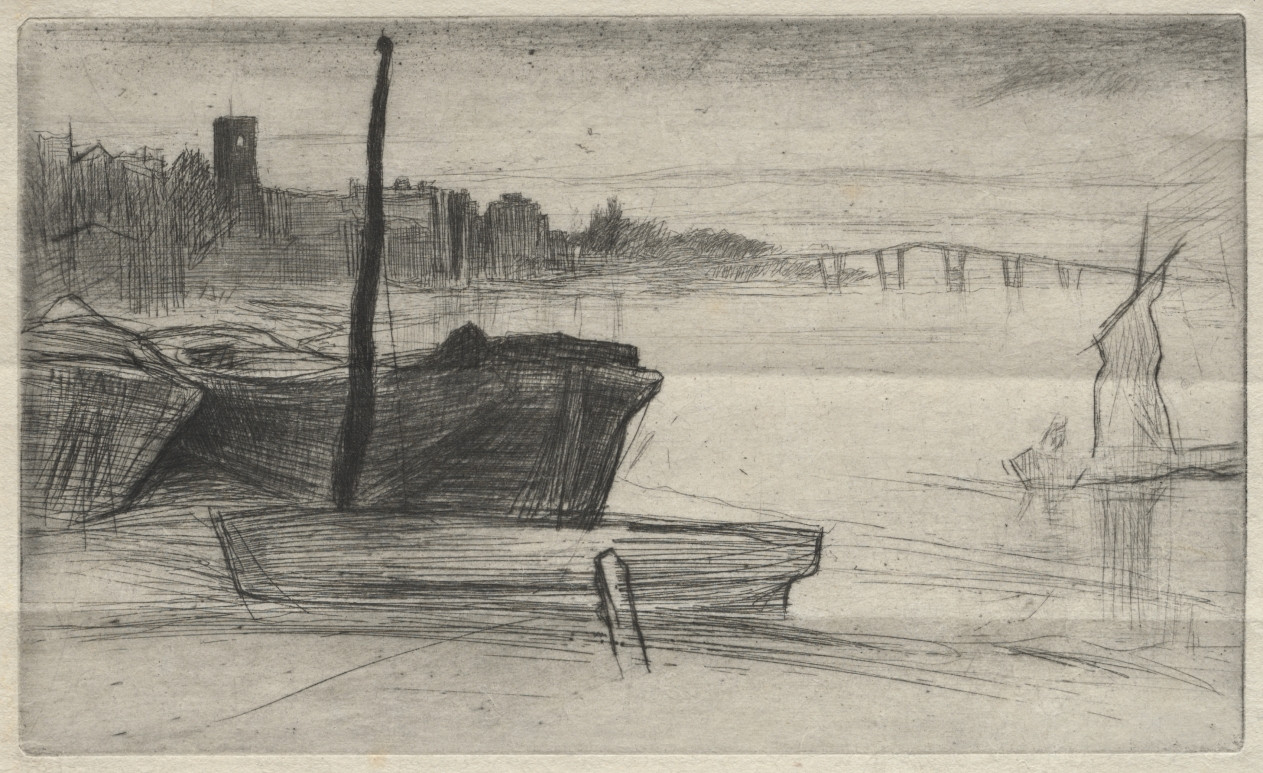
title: Chelsea Bridge and Church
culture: America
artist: James McNeill Whistler (American, 1834–1903)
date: 1871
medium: etching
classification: Print